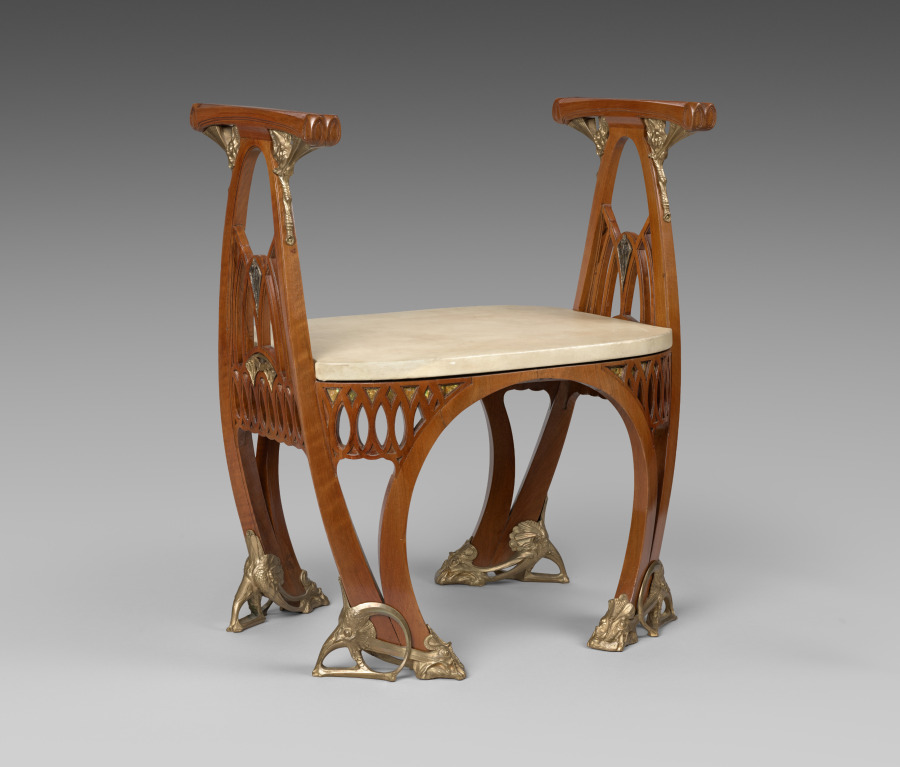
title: Tabouret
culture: France, Paris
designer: Carlo Bugatti (Italian, 1856–1940)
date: c. 1907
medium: Mahogany, parchment, gilt bronze, mother-of-pearl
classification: Furniture and woodwork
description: Although this tabouret is undocumented, its design, with its interlaced ovoid forms, gilt cast metal mounts, and mother-of-pearl inlays, is so close in style to the Cleveland Museum of Art’s celebrated tea table (1991.45) that it too can be assigned to Bugatti's Parisian period and dated about 1907.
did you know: Carlo Bugatti's son Ettore founded the luxurious car company Bugatti Automobiles.